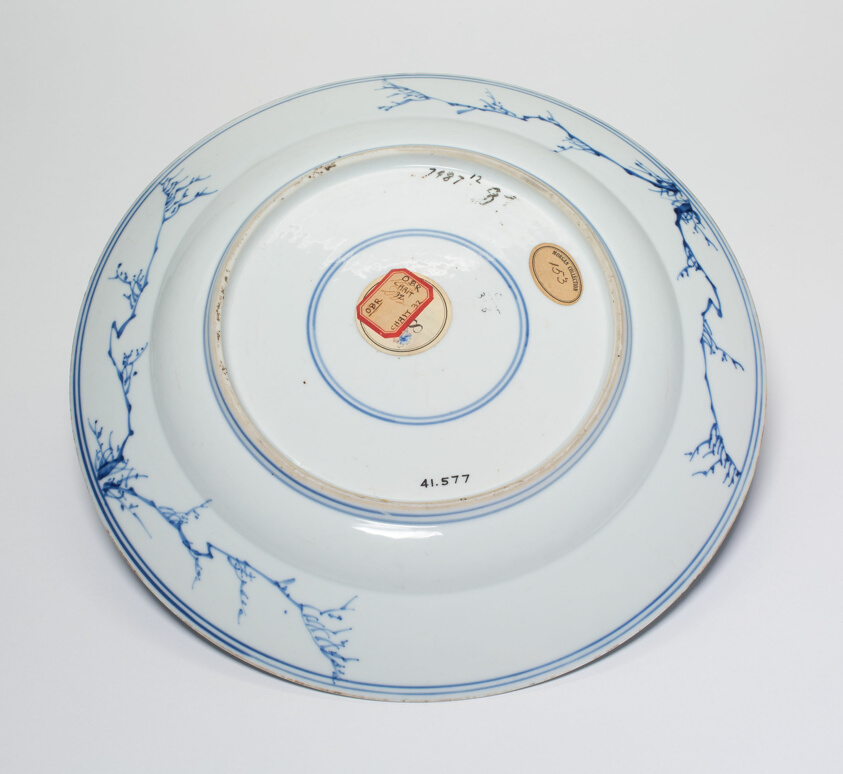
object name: Vessel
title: Dish with Plum Flowers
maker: China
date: Qing dynasty (1644–1911), late 18th/19th century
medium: Porcelain painted in underglaze blue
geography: China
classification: porcelain; asian art; ceramics